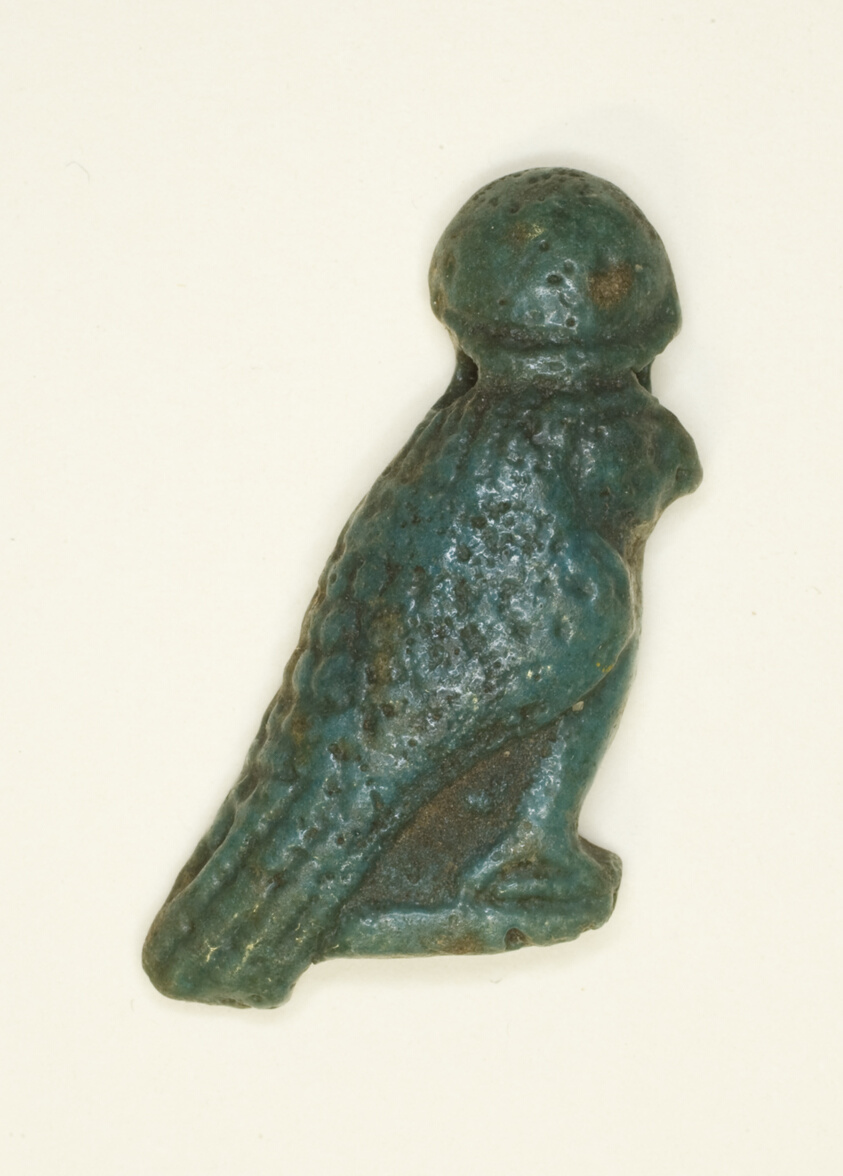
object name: Costume and Accessories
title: Amulet of the God Khonsu as a Falcon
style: egyptian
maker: Egyptian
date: Late Period, Dynasty 26–31 (664–332 BCE)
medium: Faience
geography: Egypt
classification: amulet; jewelry; ceramics; ancient art; costume; faïence (composite material)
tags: gods (deities)